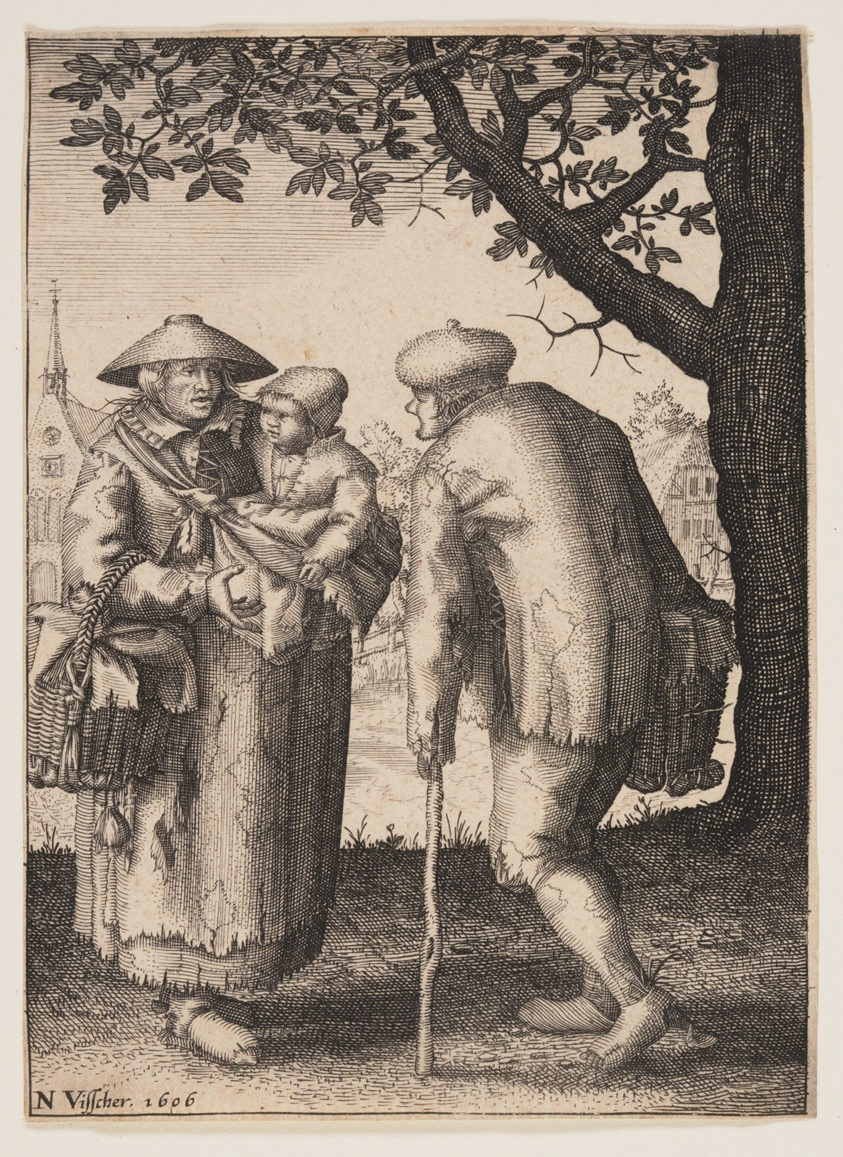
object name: Print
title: Peasant Family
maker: Claes Jansz. Visscher (Netherlandish, c. 1550–c. 1612); after David Vinckboons (Flemish, 1576-1632)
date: 1606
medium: Engraving on laid paper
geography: Netherlands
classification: engraving; paper; print; prints and drawing